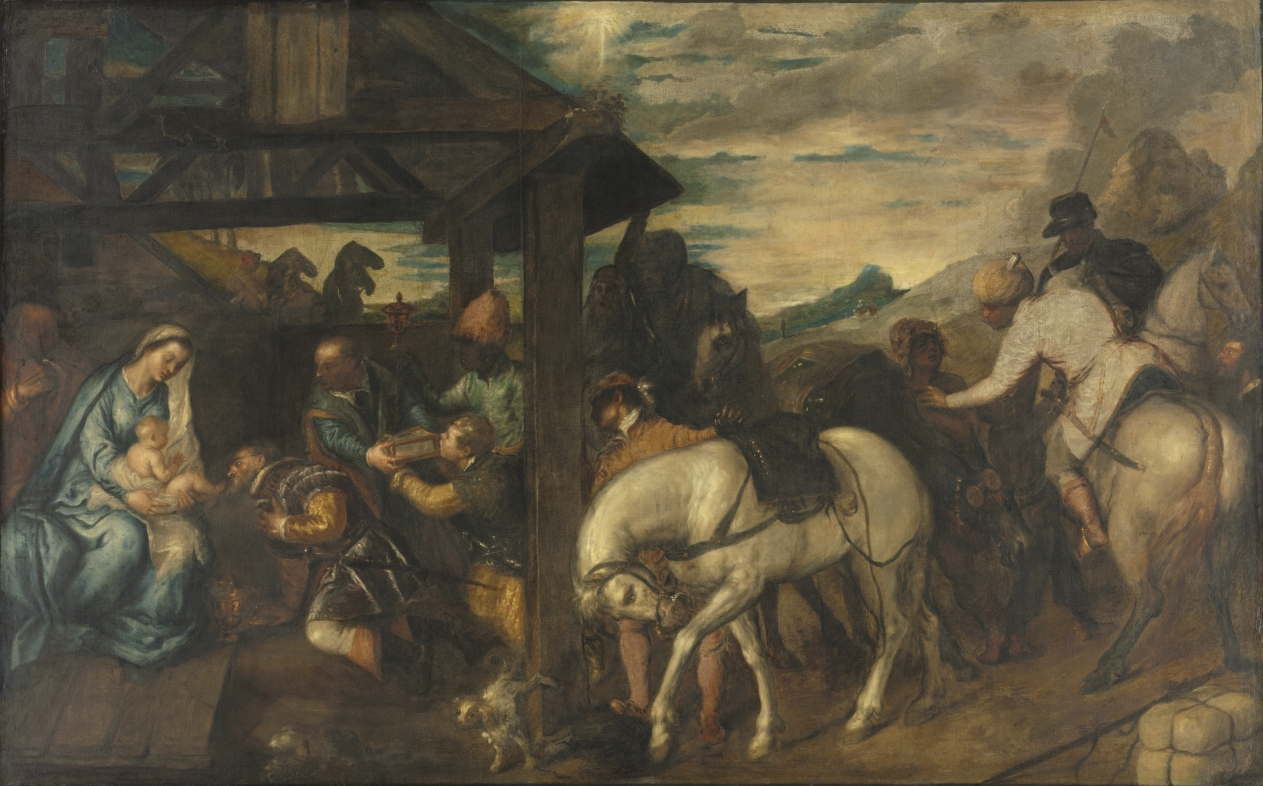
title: Adoration of the Magi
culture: Italy, 16th century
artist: Titian (Italian, c. 1488–1576)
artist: and Workshop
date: 1500s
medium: oil on canvas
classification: Painting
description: Is this painting by Titian? Titian, the celebrated and prolific 16th-century Venetian artist, and his large workshop painted several versions of this subject. Further research is needed to compare this painting with versions in Milan and Madrid to determine how much of each is by Titian himself, as opposed to being the work of his studio assistants. The Prado Museum in Madrid is often considered to have a copy made from Cleveland’s painting, which is superior in execution but not condition. Despite the damage caused by overcleaning, there are many fine passages, including the bowing white horse, his groom in shadow, and the cradled Christ child.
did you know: This painting is filled with naturalistic details such as the riders who struggle to keep their horses and mules still and a small dog who urinates on a beam.